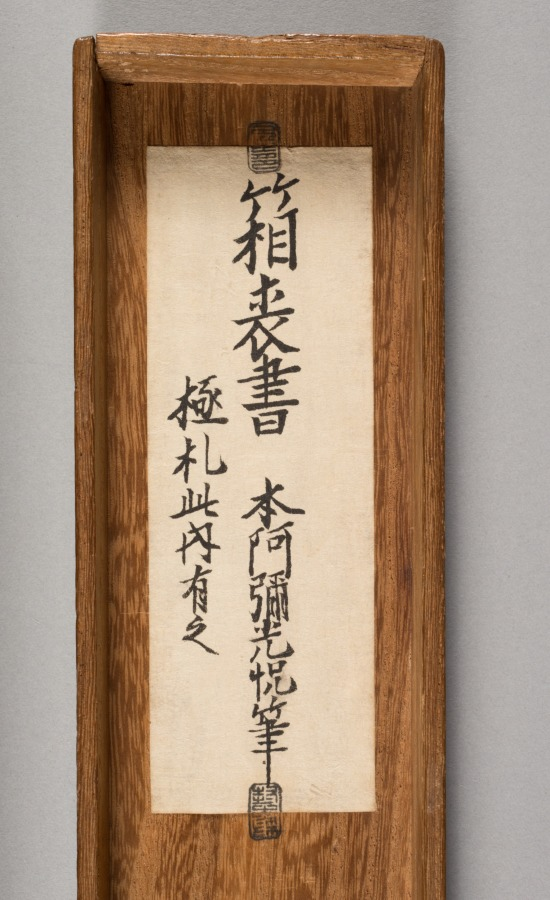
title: Hotei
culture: Japan, Muromachi period (1392–1573)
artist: Kichizan Minchō (Japanese, 1352–1431)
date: late 1300s–early 1400s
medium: hanging scroll; ink and slight color on paper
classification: Painting